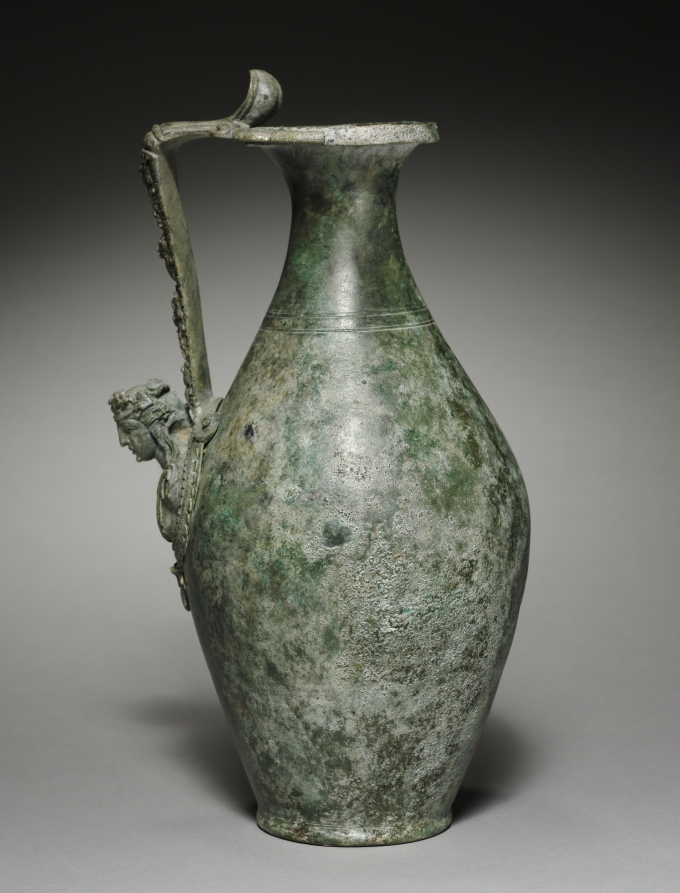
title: Olpe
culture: Italy, Roman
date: 1–100 CE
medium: cast bronze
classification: Metalwork